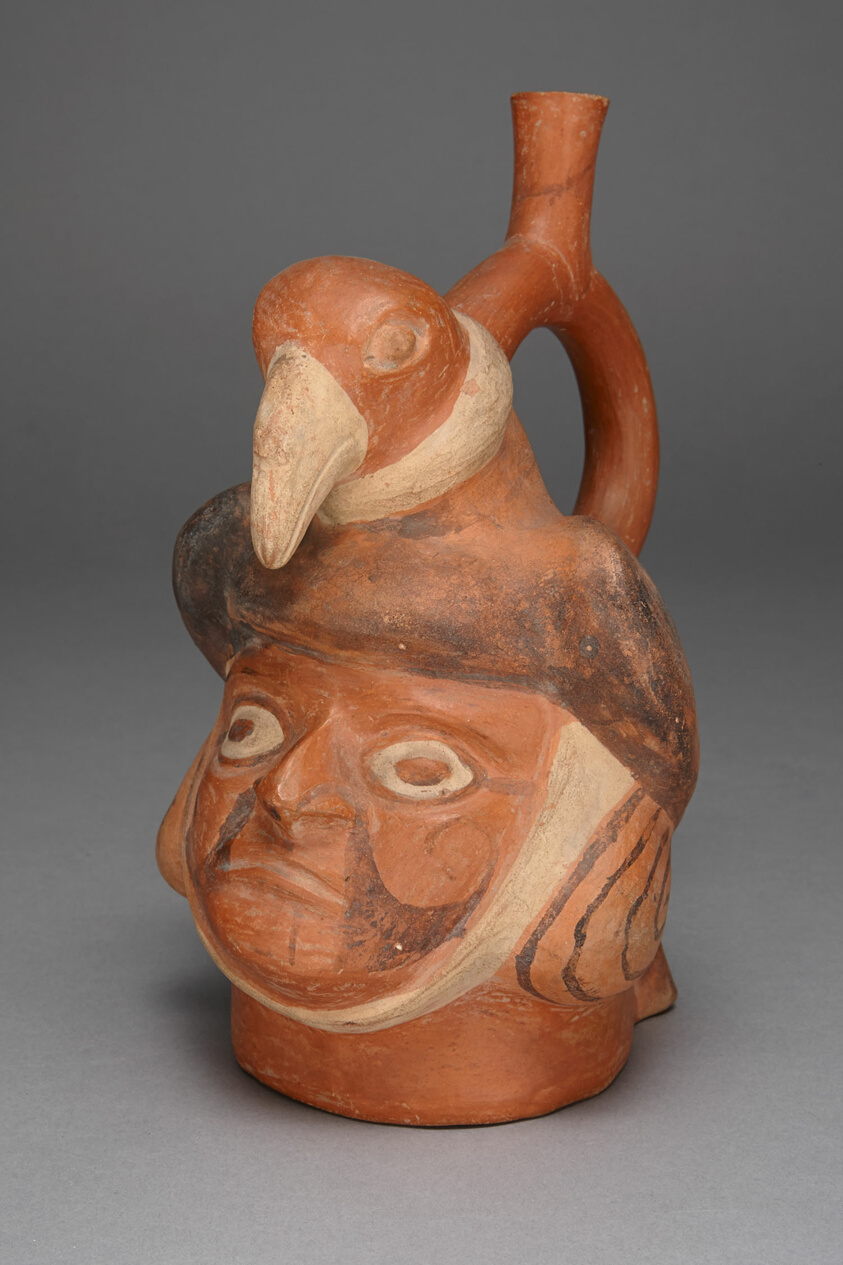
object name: Vessel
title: Vessel in Form of a Head Wearing a Bird Headdress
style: moche, mochica, early intermediate period, Pre-Columbian, americas, Arts of the Americas, andean, andes, south american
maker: Moche (North coast, Peru)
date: 100 BCE–500 CE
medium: Ceramic and pigment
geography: Moche Valley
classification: earthenware; art of the americas; ceramics; vessel